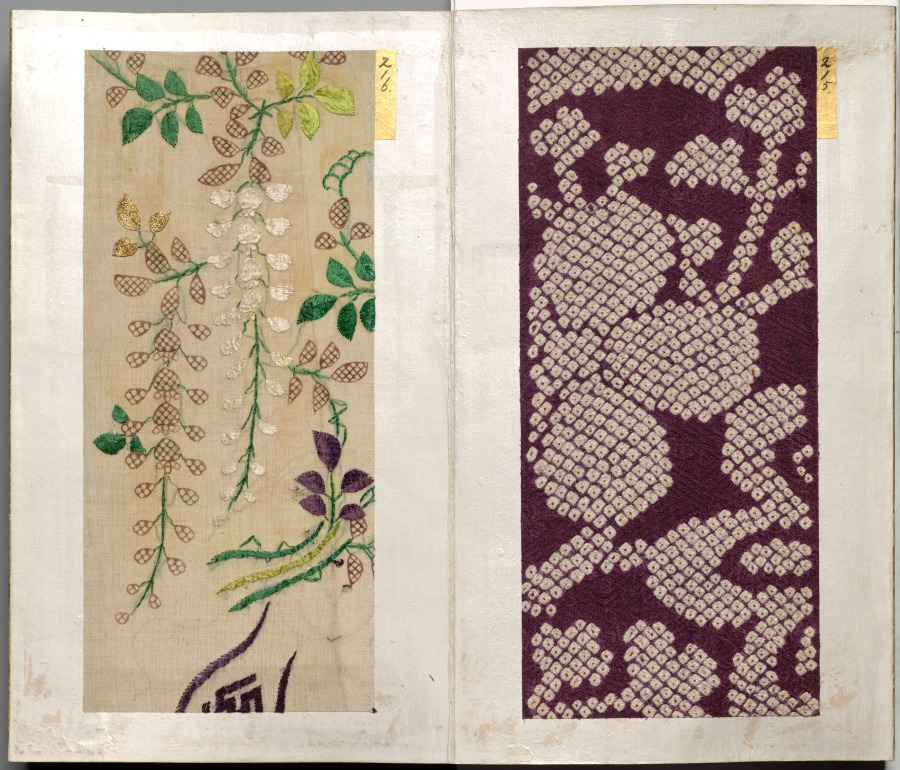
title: Album of Textile Samples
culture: Japan, Edo period (1615–1868)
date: 1600s-1700s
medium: silk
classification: Textile